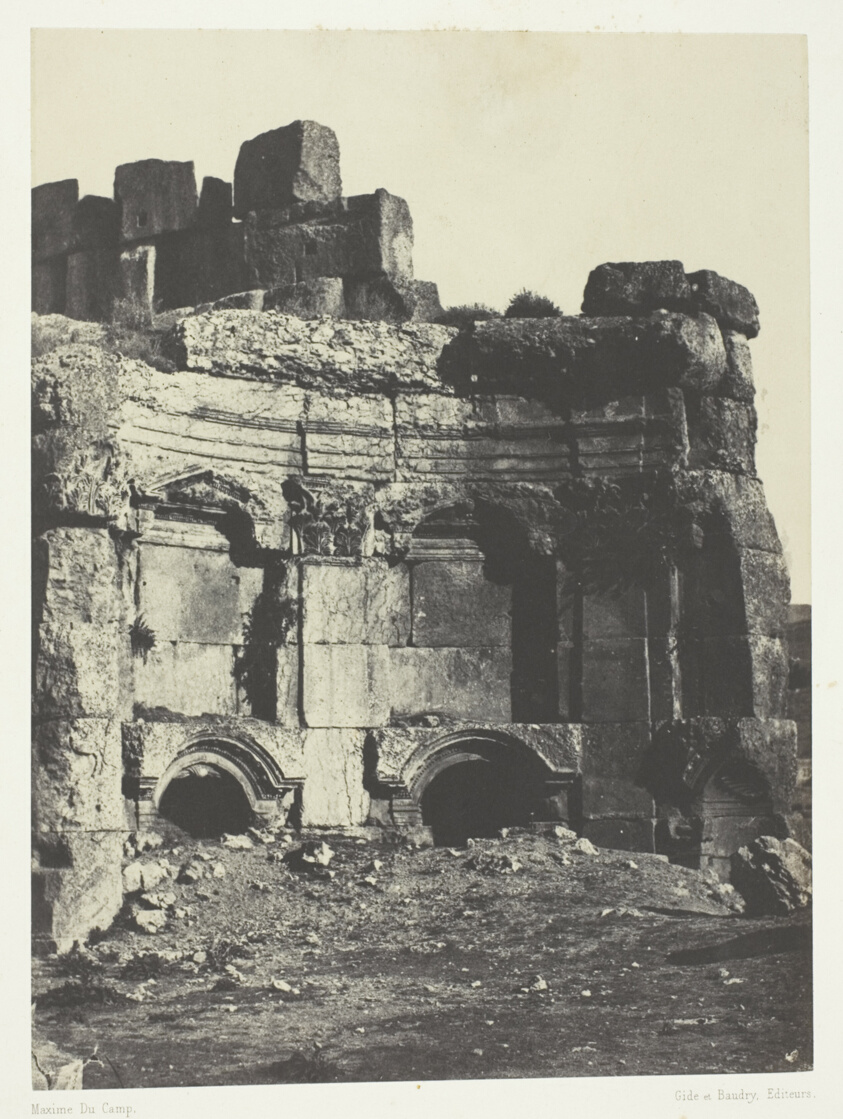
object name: Photograph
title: Baalbeck (Héliopolis), Hémicycle De L'Enciente Des Temples Du Soleil Et De Jupiter; Syrie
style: 19th century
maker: Maxime Du Camp (French, 1822–1894)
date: 1849/51, printed 1852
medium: Salted paper print, plate 120 from the album "Egypte, Nubie, Palestine et Syrie" (1852)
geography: France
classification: salted paper print; photographic process; photography; photograph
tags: Collected by Hugh Edwards, Egypte, Nubie, Palestine et Syrie